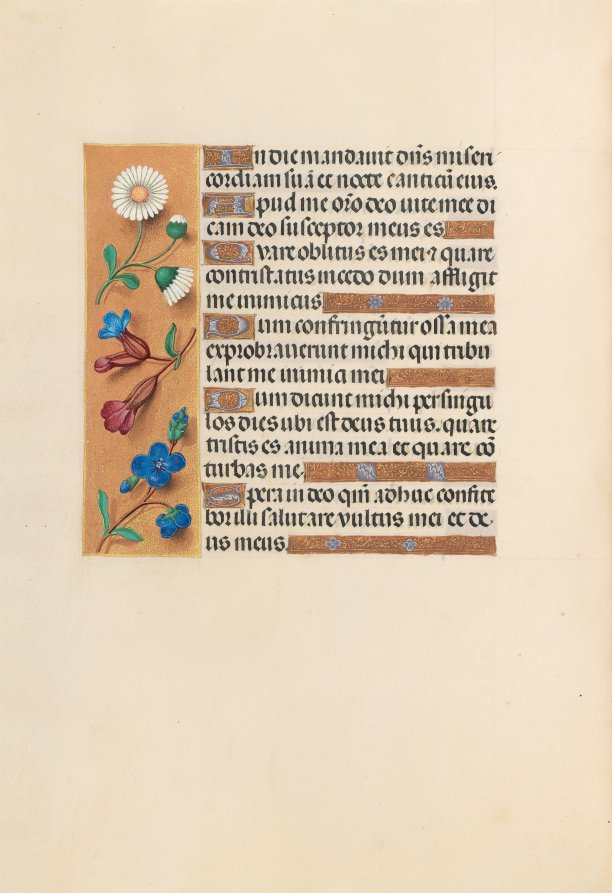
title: Hours of Queen Isabella the Catholic, Queen of Spain: Fol. 243v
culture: Flanders, Ghent and Bruges, late 15th century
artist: Master of the First Prayerbook of Maximillian (Flemish, c. 1444–1519)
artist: and Associates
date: c. 1500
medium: ink, tempera, and gold on vellum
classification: Bound Volume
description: This manuscript was illuminated by a circle of at least five highly organized manuscript painters active in the Flemish cities of Ghent and Bruges. The principal illuminator was Alexander Bening, who painted the majority of the book's miniatures. Manuscripts produced by this circle of artists are renowned for the decoration of their borders, which typically feature a rich variety of realistically-painted flowers, birds, and butterflies. This prayer book, called a book of hours, was intended not for a cleric, but for the private devotions of a lay person-in this case, Isabella the Catholic, Queen of Spain (1451-1504). Isabella's coat of arms embellishes the book's frontispiece. It is unlikely that the book was commissioned by the Queen herself; rather, she probably received it as a diplomatic gift from someone courting her patronage, perhaps Cardinal Francisco Jimenez de Cisneros. A Franciscan friar, Jimenez was dependent upon Isabella for his advancement, first to the post of Queen's confessor in 1492, and then to Archbishop of Toledo in 1495.